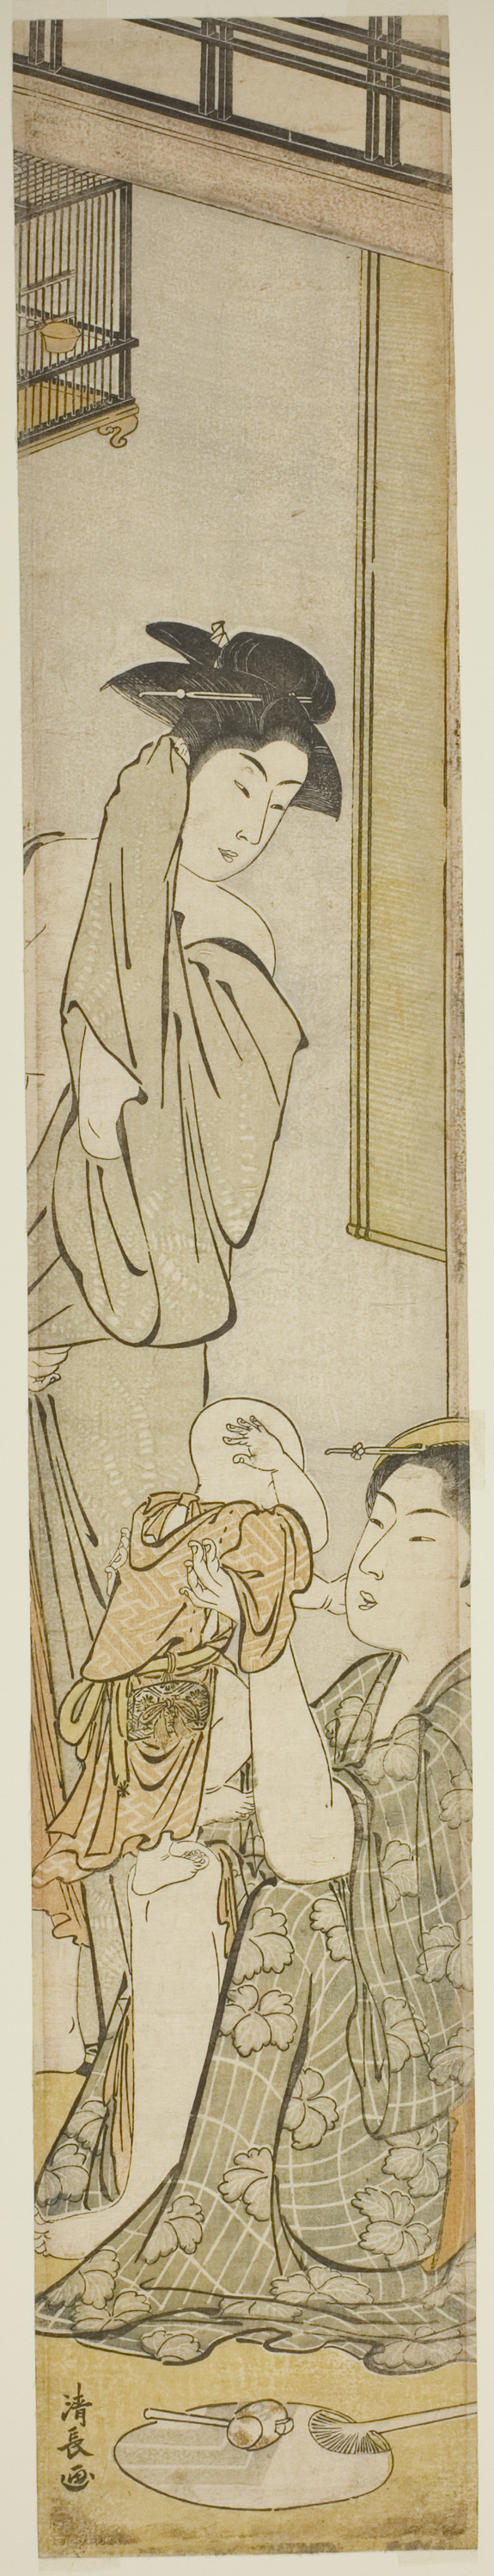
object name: Print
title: Two Women and a Child after a Bath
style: Japanese (culture or style)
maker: Torii Kiyonaga (Japanese, 1752-1815)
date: c. 1782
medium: Color woodblock print; hashira-e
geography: Japan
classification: woodblock print; print; asian art